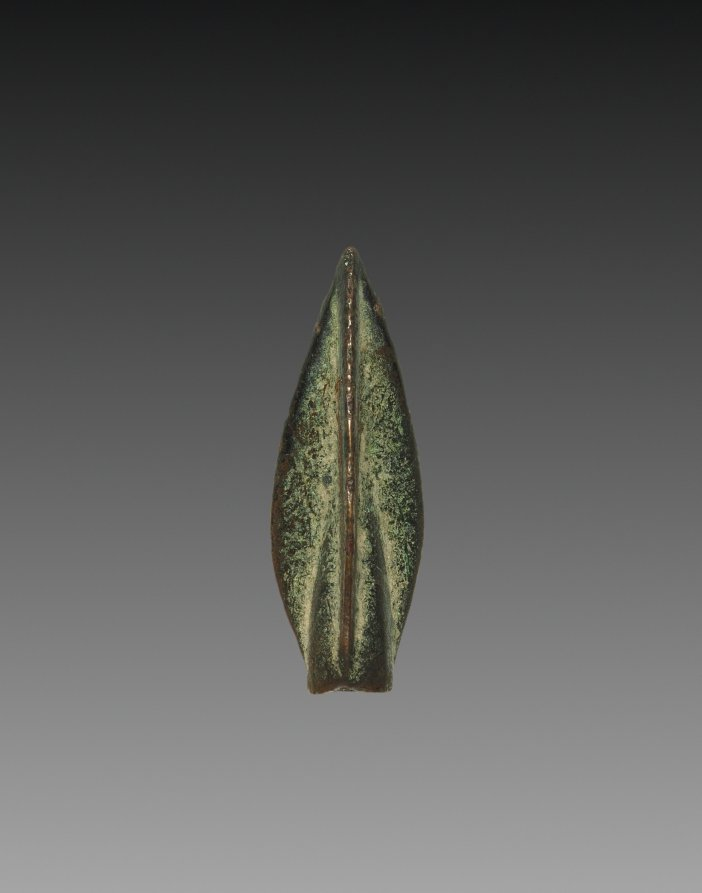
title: Arrow Point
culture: Iran, Ecbatana (?)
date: 550–330 BCE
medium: bronze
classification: Metalwork